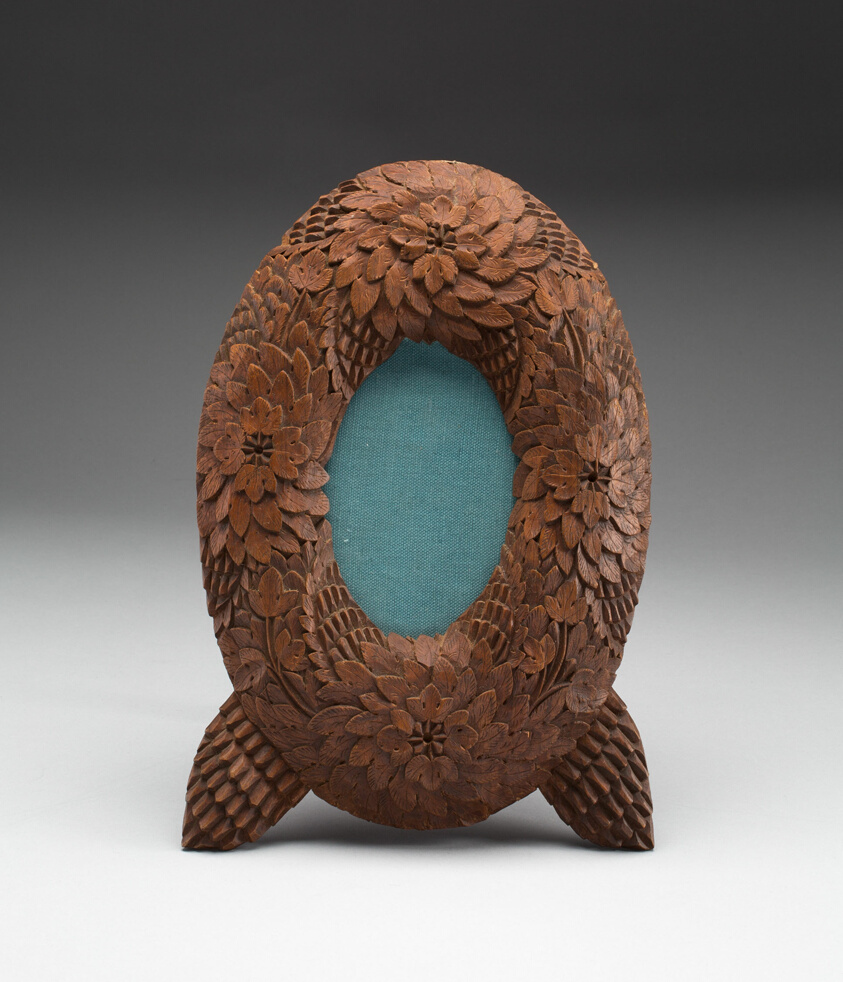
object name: Decorative Arts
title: Picture Frame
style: Folk Art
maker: Artist unknown (American, 19th century)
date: 1800–1900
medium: Walnut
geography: United States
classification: picture frame; wood; american decorative arts; american arts; decorative arts